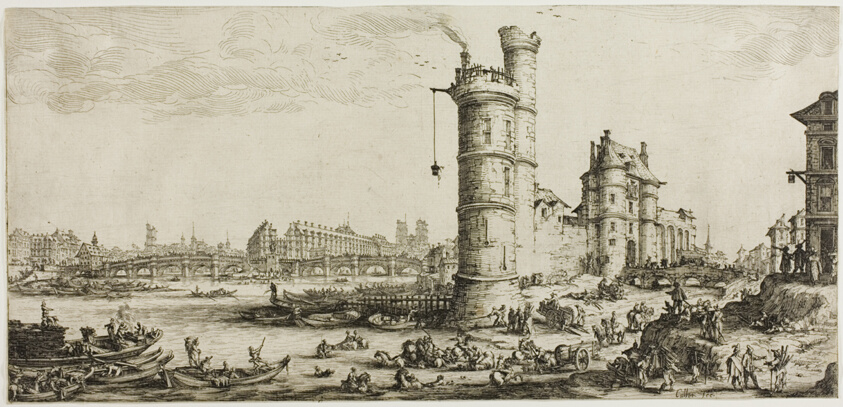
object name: Print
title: View of the Pont Neuf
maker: Jacques Callot (French, 1592-1635)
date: 1630–35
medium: Etching on paper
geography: France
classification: etching; print; prints and drawing